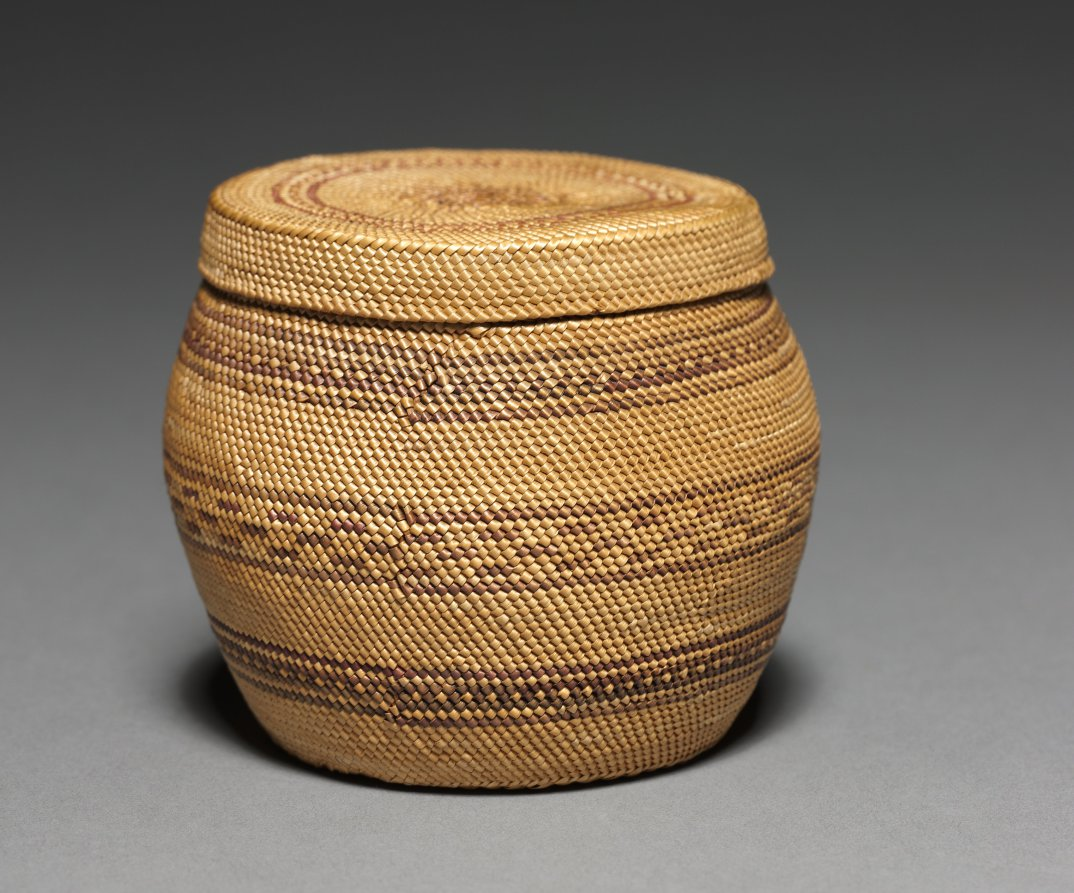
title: Covered Bowl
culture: Northwest Coast, Vancouver Island, late 19th century (?)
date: c. 1875–1900?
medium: twined grass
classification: Basketry